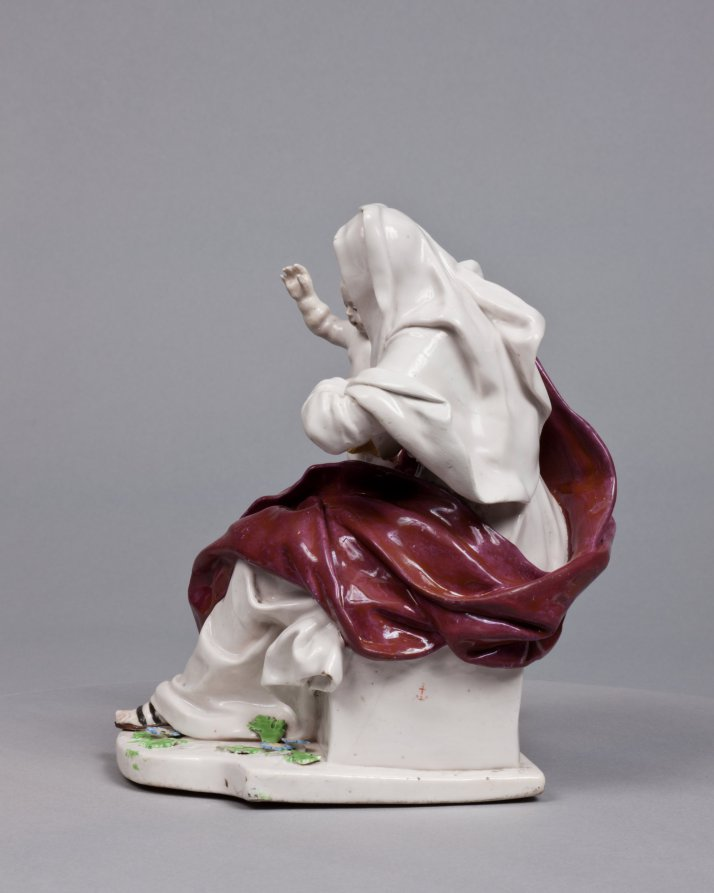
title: Madonna and Child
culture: England, Chelsea, 18th century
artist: Chelsea Porcelain Factory (Britain, London, 1745–84)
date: c. 1755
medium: porcelain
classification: Ceramic